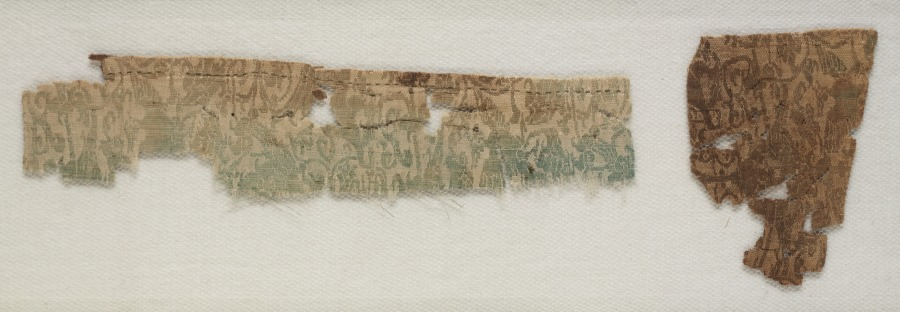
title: Fragments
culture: Egypt, Ayyubid, 12th century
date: 1100s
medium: tabby with supplementary weft; silk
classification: Textile